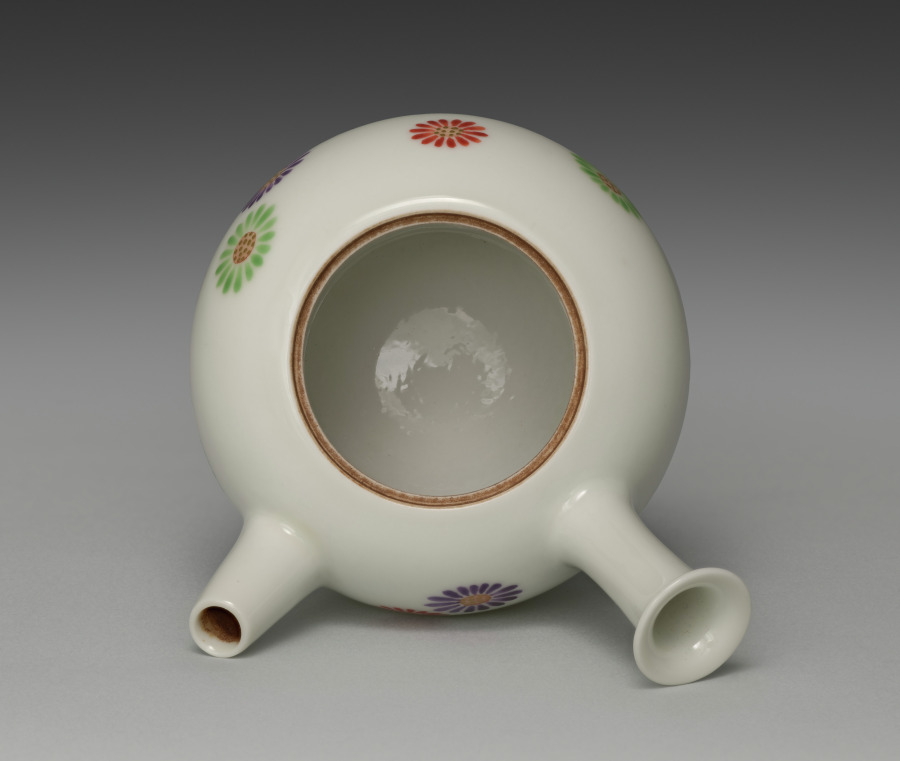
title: Teapot with Chrysanthemum Motifs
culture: Japan, Meiji period (1868–1912)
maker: Seifū Yohei III (Japanese, 1851–1914)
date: 1912–14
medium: Porcelain with overglaze color enamel and gold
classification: Ceramic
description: This side-handled sencha teapot has the lid flush against the body, forming an oblong orb. It is decorated with a sprinkling of similar chrysanthemum motifs in red, green, and purple overglaze color enamels with centers of pale red dotted with gold.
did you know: This teapot with chrysanthemum motifs shows off Seifū Yohei III’s technique of enamels painted over the glaze.